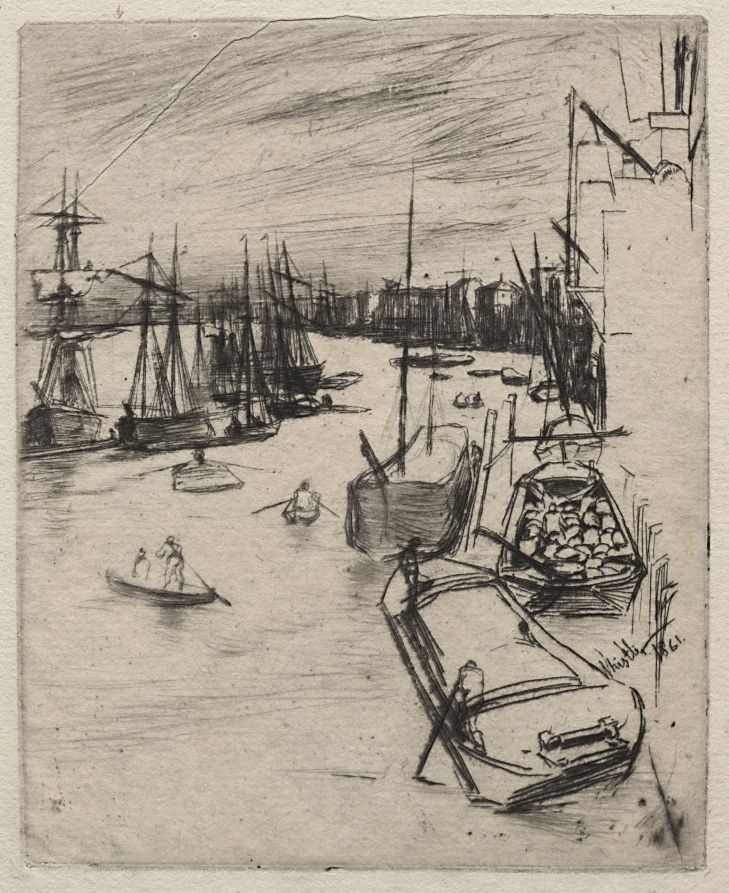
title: Little Wapping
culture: America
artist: James McNeill Whistler (American, 1834–1903)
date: 1861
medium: etching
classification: Print